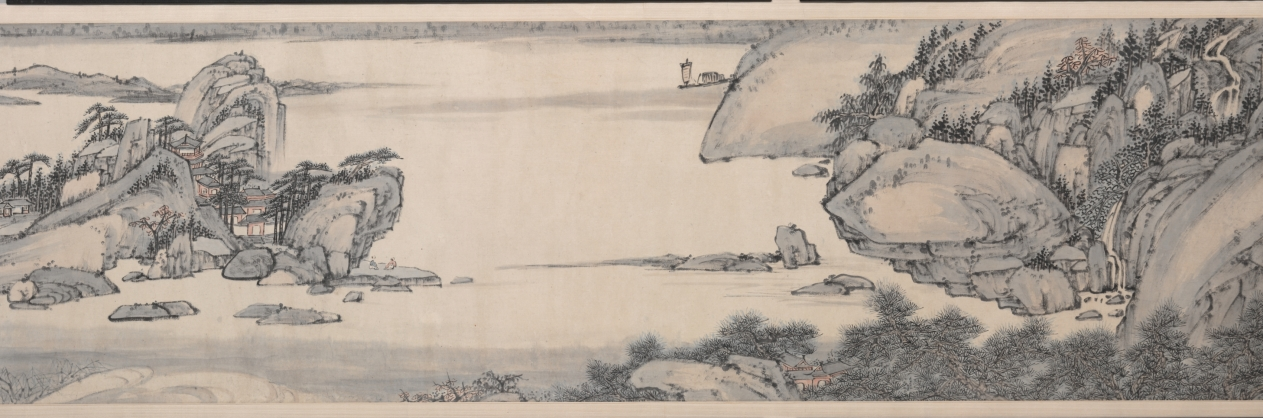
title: Pure Tones among Hills and Waters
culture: China, Qing dynasty (1644-1911)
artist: Xiao Yuncong (Chinese, 1596–1673)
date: 1664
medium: Handscroll; ink and light color on paper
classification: Painting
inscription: 種松發秀色，具是高人心。/ 鑿石築茅屋，長年覆綠陰。/ 白雲無意出，舒卷趨空林。/ 萬籟時一寂，微風墮清音。/ 此情莫可擬，此景誰能論。/ 只向千峰裏，共彈五絃琴。/ 桃花依綠水，不覺又春深。 甲辰花朝題于青蓮閣, 鐘山老人蕭雲從。[印] 鐘山老人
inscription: Title and inscription, dated 1744, and 3 seals of Shen Feng 沈鳳 (1685-1755).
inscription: 4 colophons and 24 additional seals: 1 colophon, dated 1811, and 5 seals of Xiang Yuan 項源 (active about 1811); 1 colophon, dated 1858, and 2 seals of Qi Junzao 祁寯藻 (1793-1866); 1 colophon and 4 seals of Zhang Yunzhong 張允中 (1881–1960?); 4 seals of Jiang Xun 江恂 (active about 1753–after 1780); 1 colophon dated 1943, and 2 seals of Wang Shaoming 汪兆銘 (Wang Jingwei 汪精衛, 1883–1944); 1 seal of Qi Zhiliu 祁之鏐 (active about 1858); 2 seals of Yu Zhimeng 俞芷盟 (second half of 19th century); 4 seals unidentified.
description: Painted at age 68, this landscape is one of Xiao Yuncong’s most mature works. Extraordinary in its combination of fine details with bold brushstrokes and bluish washes, it is also one of his longest compositions in handscroll format, extending over 23 feet. Throughout his lifetime, Xiao visited Nanjing and Yangzhou, where he met with other painters and literati. Regarded as the founder of the Gushu school (姑孰派) of painting, Xiao painted from nature, and his landscapes are informed by his travels, as well as by his experience as a print designer.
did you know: Biographical notes on Xiao Yuncong relate that he did not pursue the career of an official, but "furnished a cottage in the eastern suburbs [of Wuhu in Anhui province] and amused himself playing the qin (zither) and reading every day."